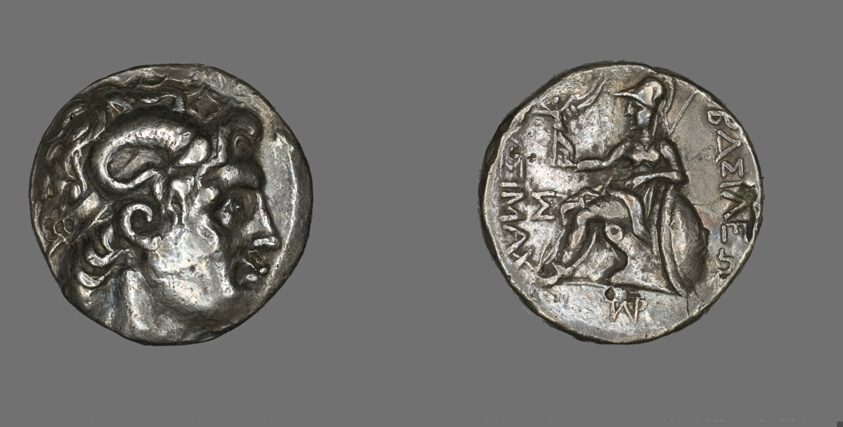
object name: Coin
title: Tetradrachm (Coin) Portraying Alexander the Great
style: ptolemaic, ancient, greek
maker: Greek, Ptolemaic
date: 297-281 BCE, issued by King Lysimachus of Thrace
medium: Silver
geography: Roman Empire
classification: coin; ancient art